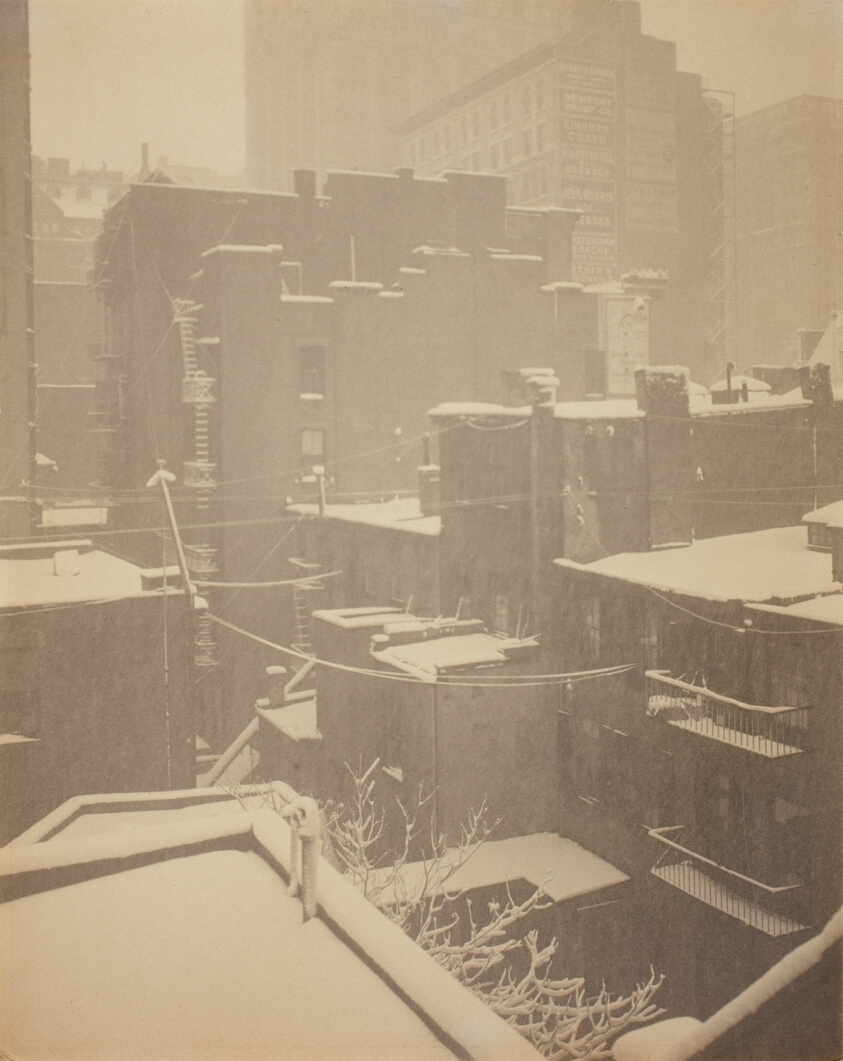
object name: Photograph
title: From the Back-Window "291"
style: Pictorialism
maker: Alfred Stieglitz (American, 1864–1946)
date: 1915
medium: Platinum print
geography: United States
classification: platinum print; photographic process; photography; photograph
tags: cityscapes